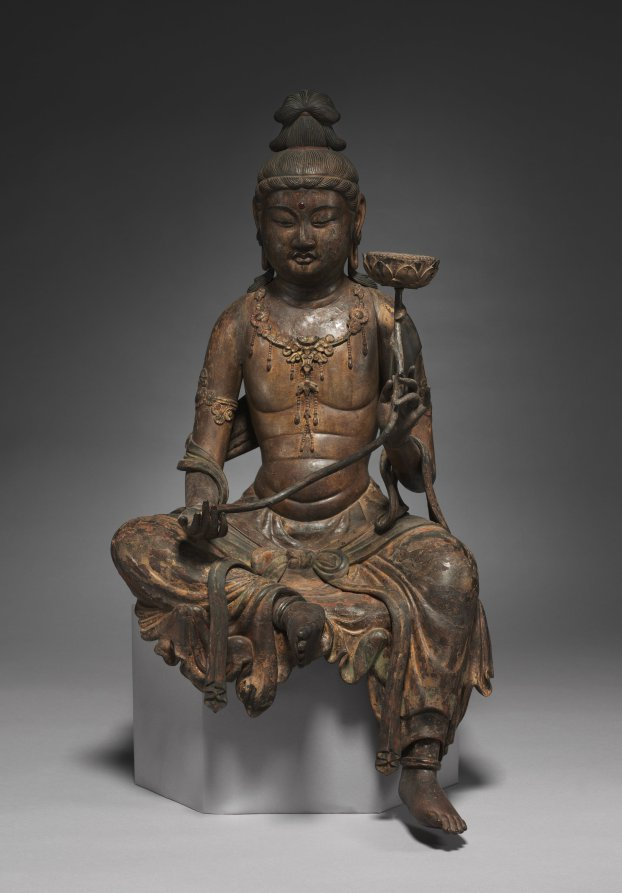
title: Bodhisattva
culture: Japan, Kamakura period (1185–1333)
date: mid-1200s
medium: wood with traces of lacquer, polychromy, and cut gold lear (kirikane)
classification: Sculpture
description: A Bosatsu (Bodhisattva in Sanskrit) is a being that has attained enlightenment but has compassionately refrained from entering nirvana in order to save others. As an attendant of Buddha, Bosatsu assumes many forms, all of which are worshipped as deities in Japanese Buddhism.